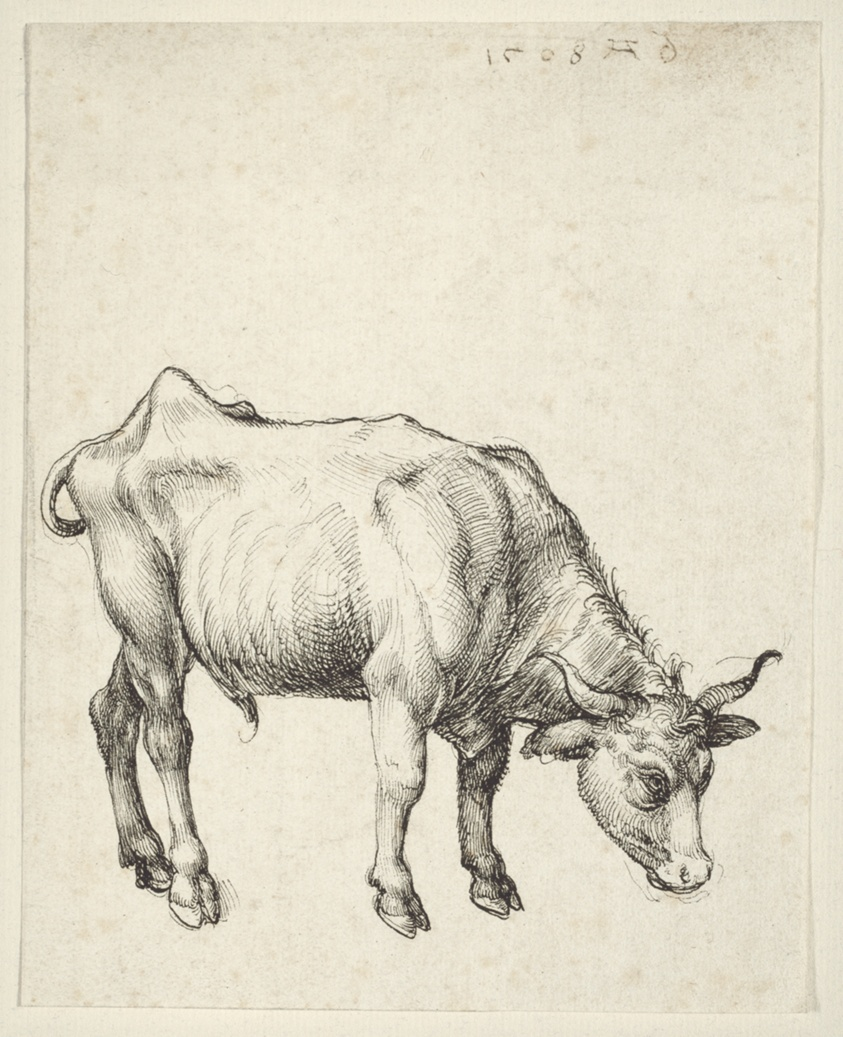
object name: Drawing and Watercolor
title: Young Bull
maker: Albrecht Dürer (German, 1471–1528)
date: c. 1496, erroneously inscribed in another hand 1508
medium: Pen and black ink on ivory laid paper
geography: Germany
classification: pen and ink drawings; drawings (visual works); prints and drawing; paper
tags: bulls, animals